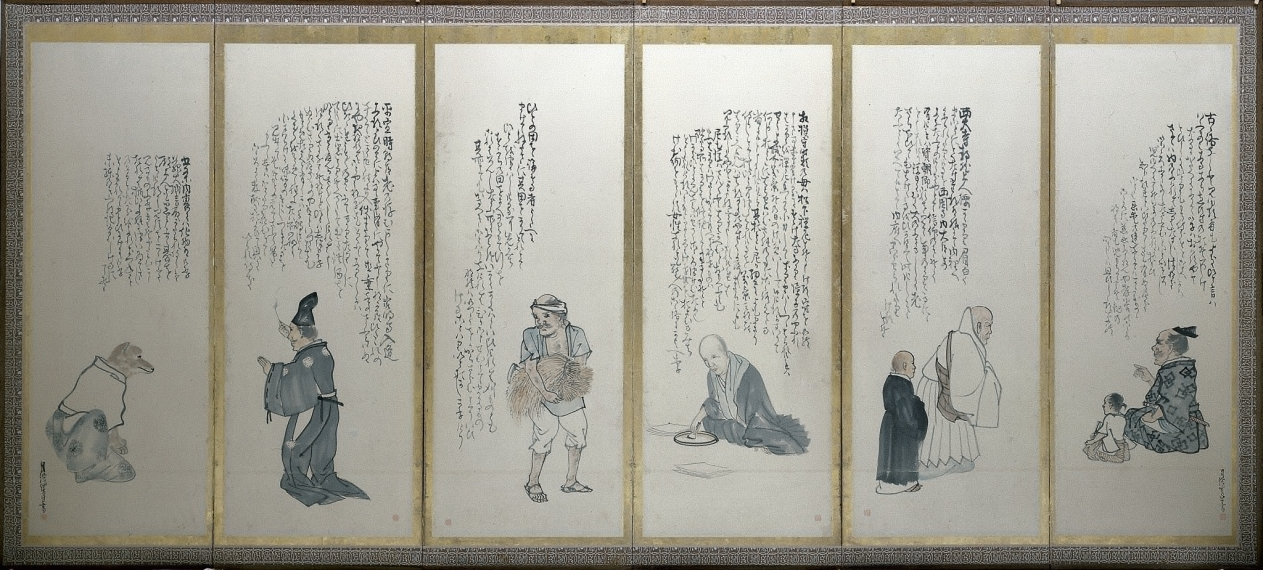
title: Scenes from Essays in Idleness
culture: Japan, Edo period (1615–1868)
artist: Matsumura Goshun (Japanese, 1752–1811)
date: late 1700s–early 1800s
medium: One of a pair of six-panel folding screens; ink and color on paper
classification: Painting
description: Matsumura Goshun inscribed passages from Buddhist monk Yoshida Kenkō’s (1283–1350) well-known collection of anecdotes, Essays in Idleness, across the top of the panels of this screen and its pair. Goshun illustrated the narratives with his vision of the figures who feature in them. The texts cascade down from right to left, forming unique compositional relationships with the images below. The episodes offer a veritable portrait of human idiosyncrasy, from one man’s deep faith in radishes to another’s inability to avoid nicknames.